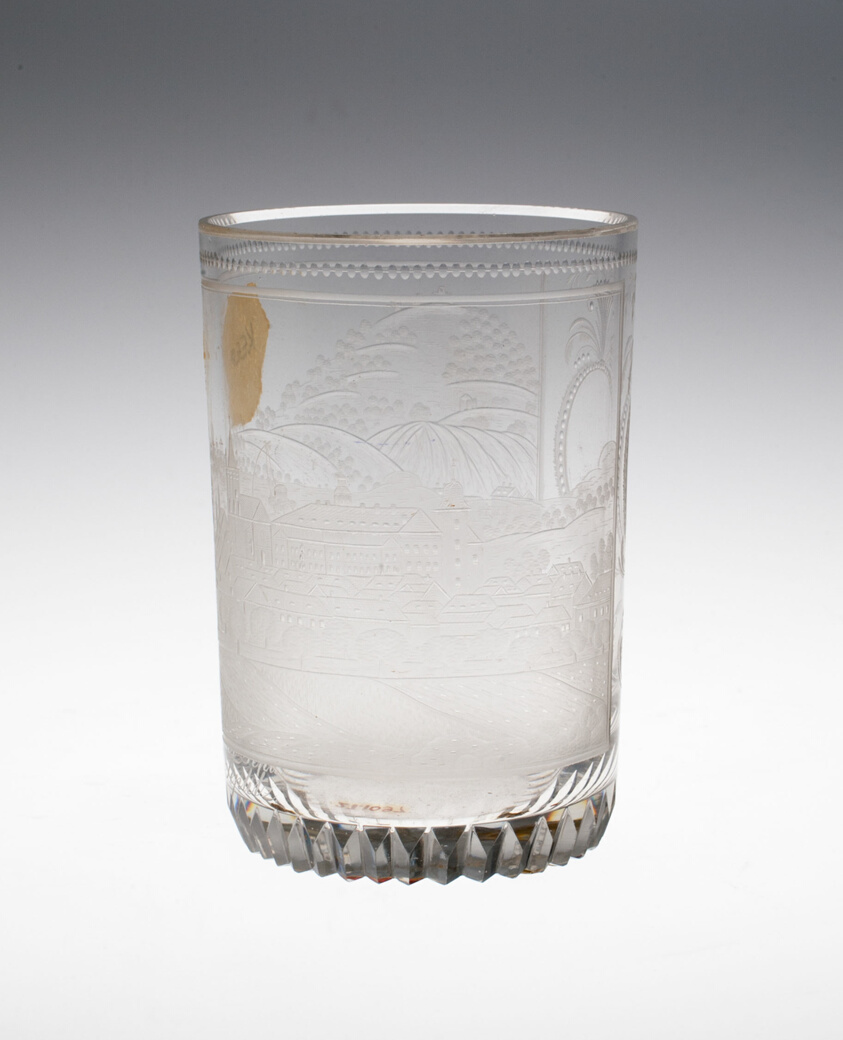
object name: Glass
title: Beaker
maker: Bohemia, Czech Republic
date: c. 1810/20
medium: Glass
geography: Bohemia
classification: glass; european decorative arts